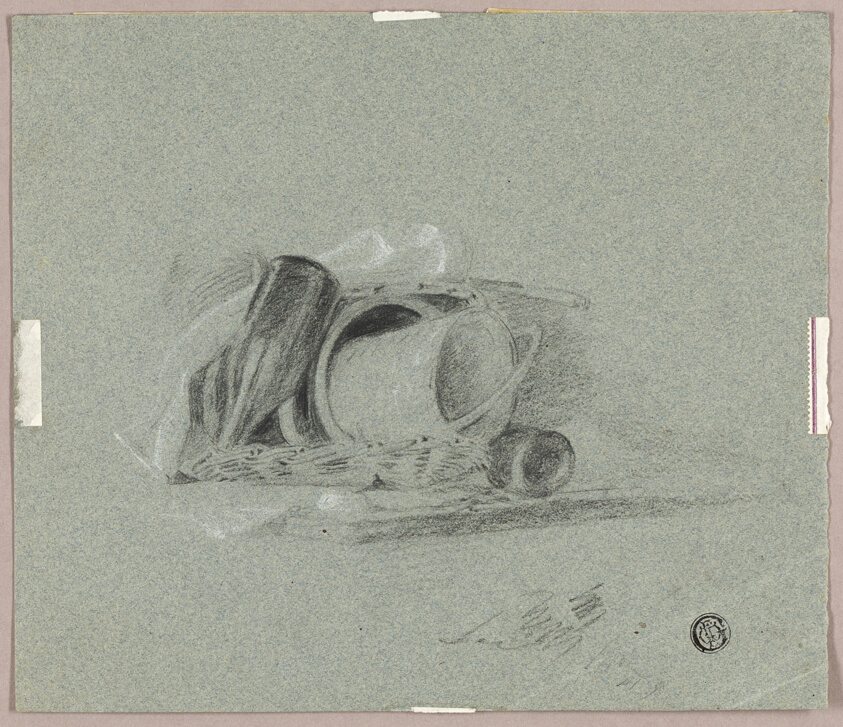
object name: Drawing and Watercolor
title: Still Life with Bottles and Pail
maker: School of Peter De Wint; English, 1784-1849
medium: Black chalk, heightened with white chalk, with graphite, on blue wove paper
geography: England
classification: chalk; paper; drawings (visual works); prints and drawing